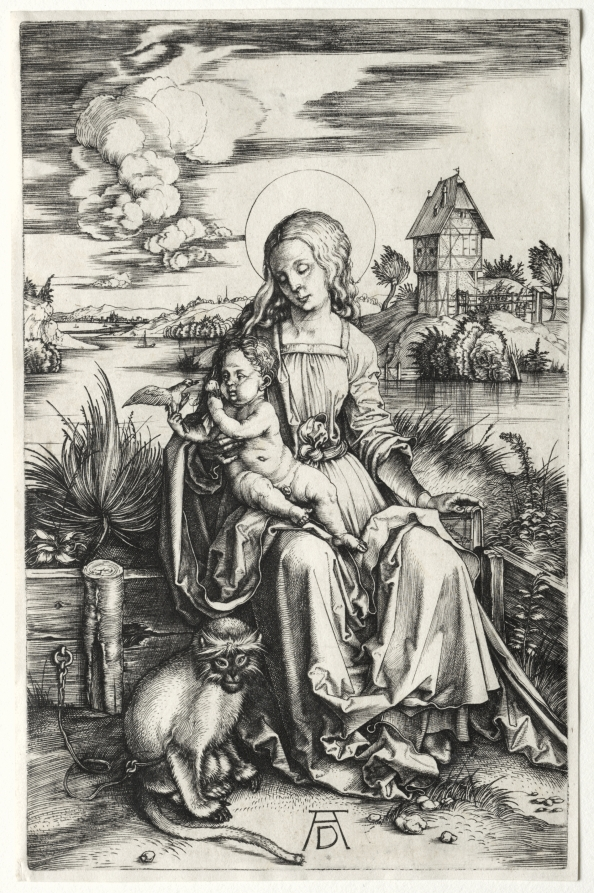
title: The Virgin and Child with a Monkey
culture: Germany, late 15th Century-early 16th Century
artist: Albrecht Dürer (German, 1471–1528)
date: c. 1498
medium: engraving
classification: Print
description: Catholic theology during the Renaissance taught the Virgin Mary as a woman born without original sin, an idea manifested in botanical and zoological symbols. Albrecht Dürer portrayed the Virgin and Christ child within a garden enclosed by a low wood gate. Mary gazes down at her son, who holds a bird with his left hand, a symbol of the souls he will save through his Crucifixion. The tamed monkey, chained to the fence, is an accurate zoological study (probably a Barbary macaque) with a theological role: associated with bodily pleasure, it shows the power of Mary’s virtue over Eve’s sin.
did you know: The monkey portrayed here can be identified as a Barbary macaque, which the artist may have seen as part of a zoological collection in Germany.